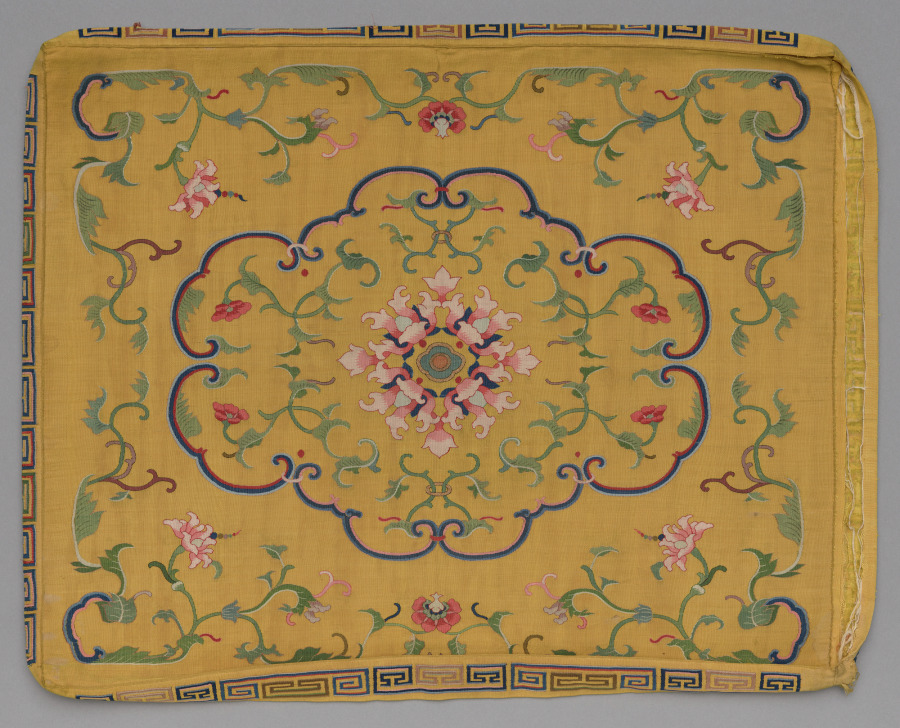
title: Cushion Cover (one of a set of four)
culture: China, Qing dynasty (1644-1911)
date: 1700s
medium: silk, metallic thread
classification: Textile